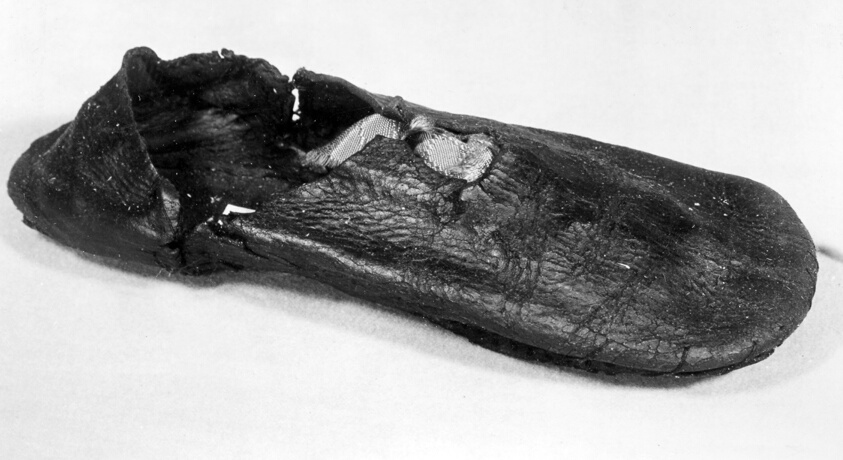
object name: Textile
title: Shoe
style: elizabethan, tudor, european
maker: England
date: 16th century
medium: Leather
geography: England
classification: textile; costume accessory - shoe; shoes - misc; costume; dress (garment); clothing